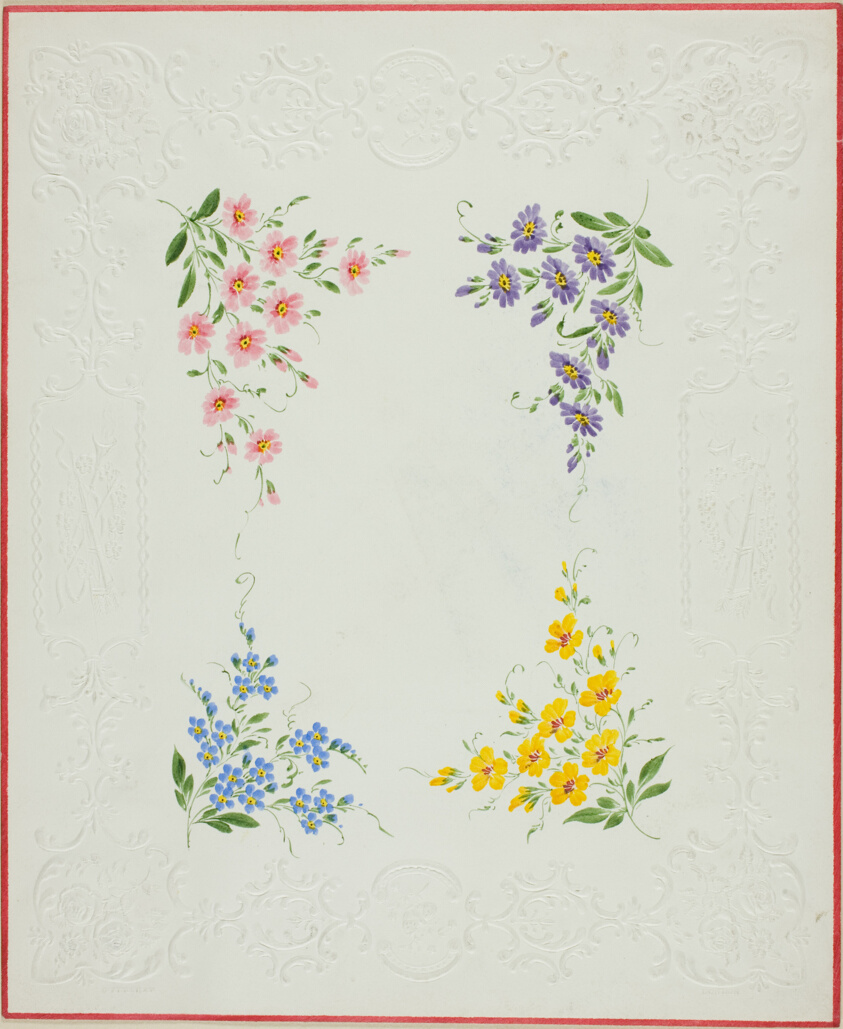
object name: Drawing and Watercolor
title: Valentine envelope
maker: George Kershaw (English, 19th century)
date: c. 1850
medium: Watercolor on embossed ivory wove paper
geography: England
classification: valentine; prints and drawing; paper